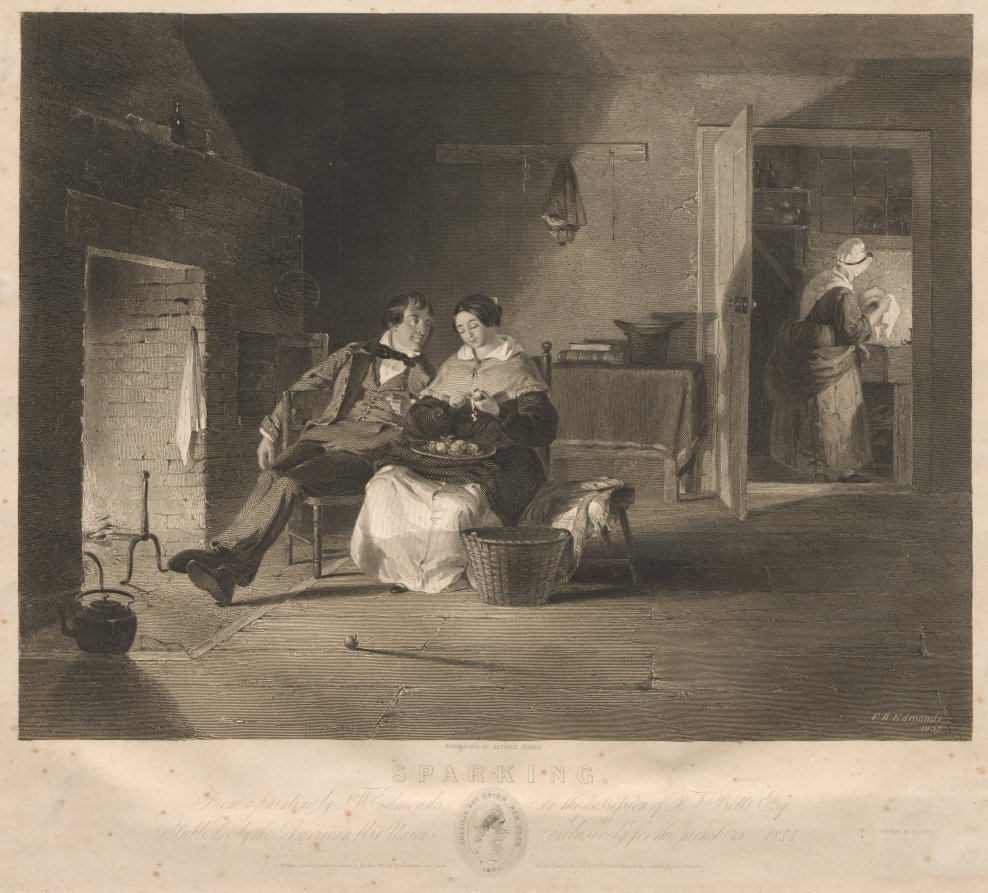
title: Sparking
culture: America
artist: Alfred Jones (American, 1819–1900)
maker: after Francis William Edmonds (American, 1806-1863)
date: 1845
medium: engraving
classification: Print